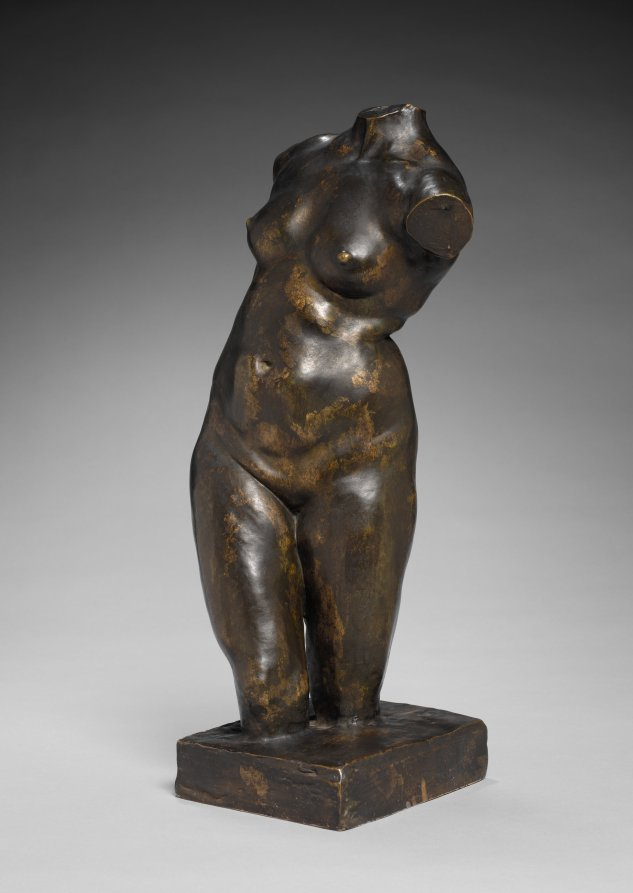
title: Torso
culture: France, 19th century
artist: Jules Dalou (French, 1838–1902)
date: c. 1850 – 1899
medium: bronze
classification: Sculpture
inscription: Signed: "J. Dalou"; "Susse Fres. Ed[ts] Paris"